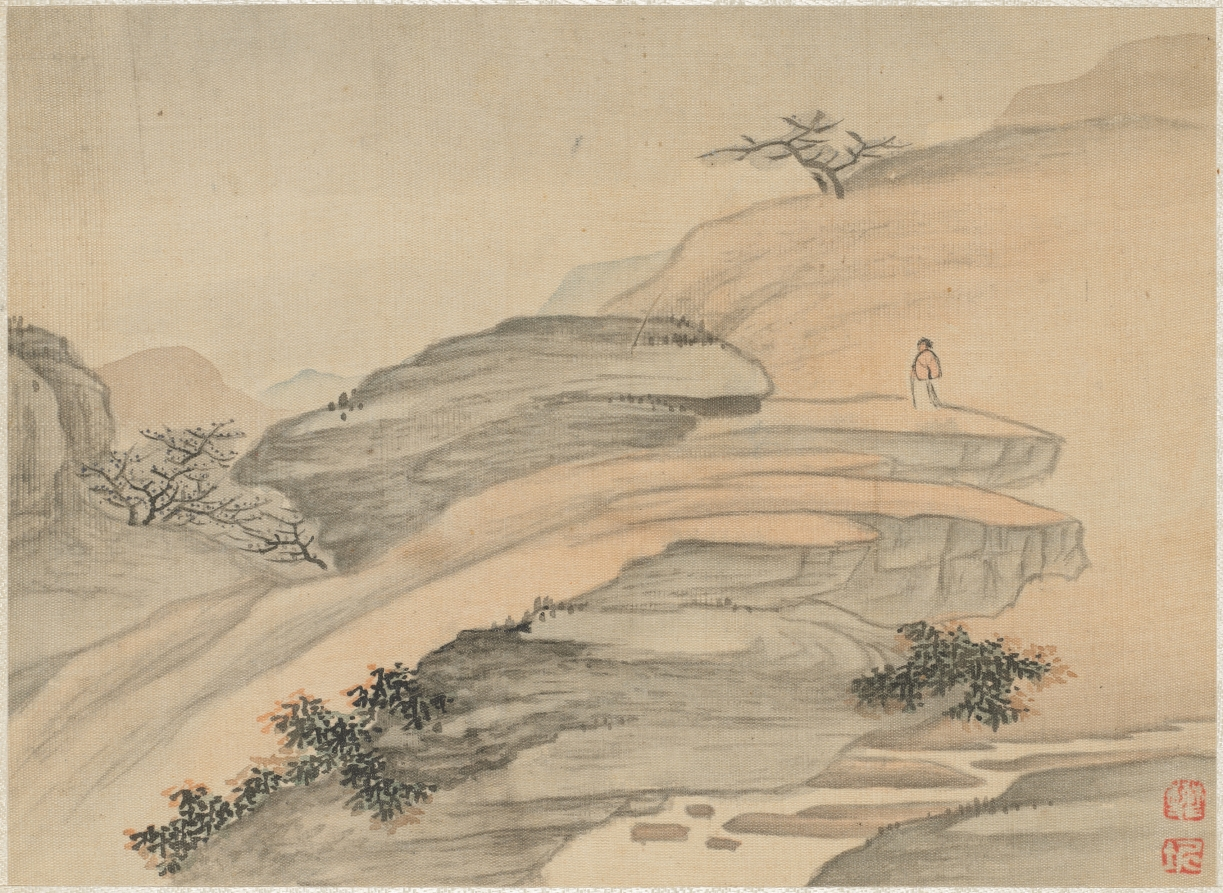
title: Album of Miscellaneous Subjects, Leaf 5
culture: China, Qing dynasty (1644-1911)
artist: Fan Qi (Chinese, 1616–after 1694)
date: early 1650s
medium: album leaf, ink and color on silk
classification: Painting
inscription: Artist seal: Fan Qi 樊圻. Poem by Zhou Yi 周儀 (mid 17th century–about 1705): That stone path surrounded by streams - for whom was it created?/ Leaning on my staff, I walk and hum, arriving alone./ As soon as I ascend to gaze at these mountains, my happiness increases,/ Every morning the moistening dew makes slippery the green moss.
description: Fan Qi's painting on the fifth leaf evokes Zuo Si's poetic line: I shake my robe atop the cliff of thousand ren. The calligraphy by Zhou Yi adjacent to the painting reads: That stone path surrounded by streams—for whom was it created? Leaning on my staff, I walk and hum, arriving alone. As soon as I ascend to gaze at these mountains, my happiness increases, Every morning the moistening dew makes the green moss slippery.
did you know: Barren tree branches on the peak and the bushes' reddish foliage give the scene an autumnal feel.